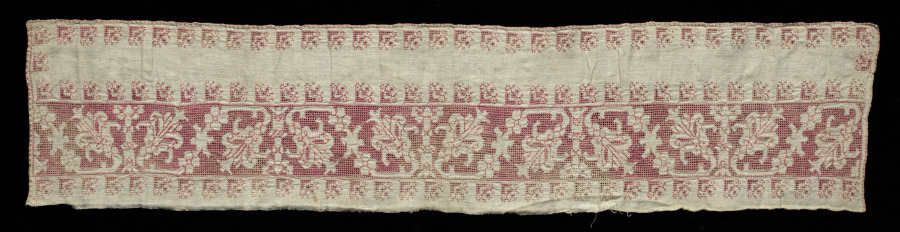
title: Towel End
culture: Italy, Sicily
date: 1760–1840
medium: Linen: needle lace (drawnwork) and silk embroidery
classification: Lace